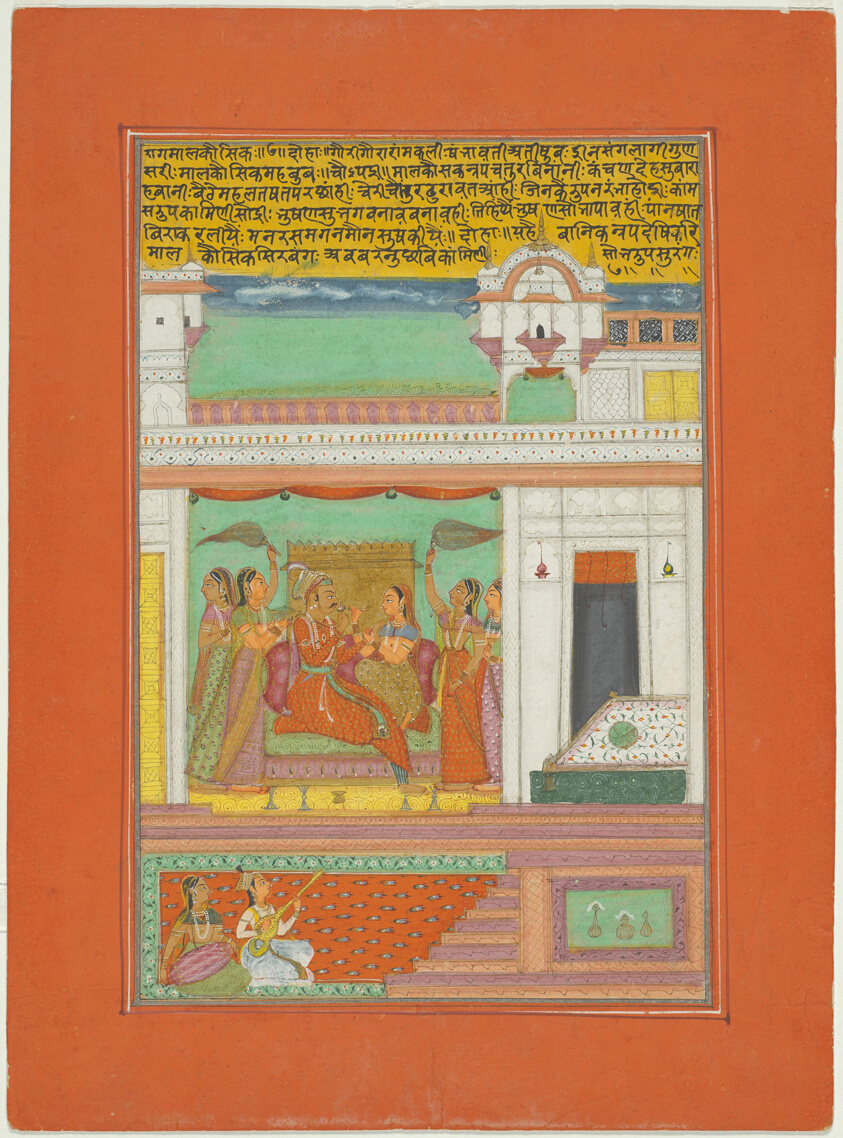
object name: Painting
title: Raga Malkaushika, Page from a Jaipur Ragamala Set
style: South Asian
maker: India; Rajasthan, Jaipur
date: c. 1750-1770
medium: Opaque watercolor and gold on paper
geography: Rajasthan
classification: miniature painting; painting; asian art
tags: music, musicians